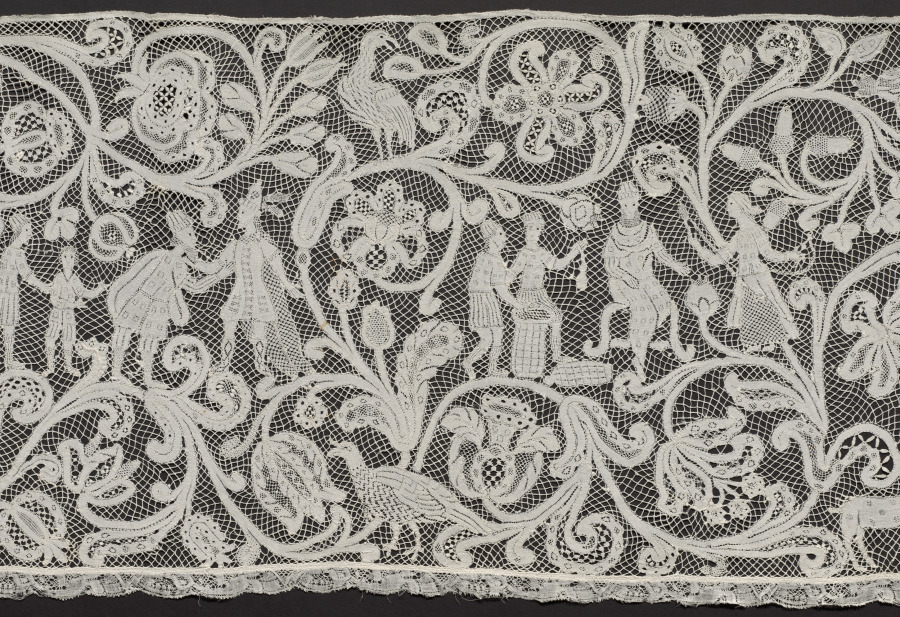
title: Lace Flounce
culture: Italy, Milan(?)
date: 1750–99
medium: Linen: bobbin lace (Punto di Milano)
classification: Lace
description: Being the most prestigious material, lace was used extensively by the 1600s for altar linen and for trimming priest’s albs, often incorporating finely rendered religious images amid blossoming vines. This alb flounce depicts scenes from the Old Testament story of Joseph, whose jealous brothers sold him to a caravan bound for Egypt. Joseph later interpreted dreams of the pharaoh, who made him ruler. When famine in Canaan caused Joseph’s ten brothers to travel to Egypt in search of food, they bowed down to him. After he revealed his identity, he forgave his brothers and God saved the family.